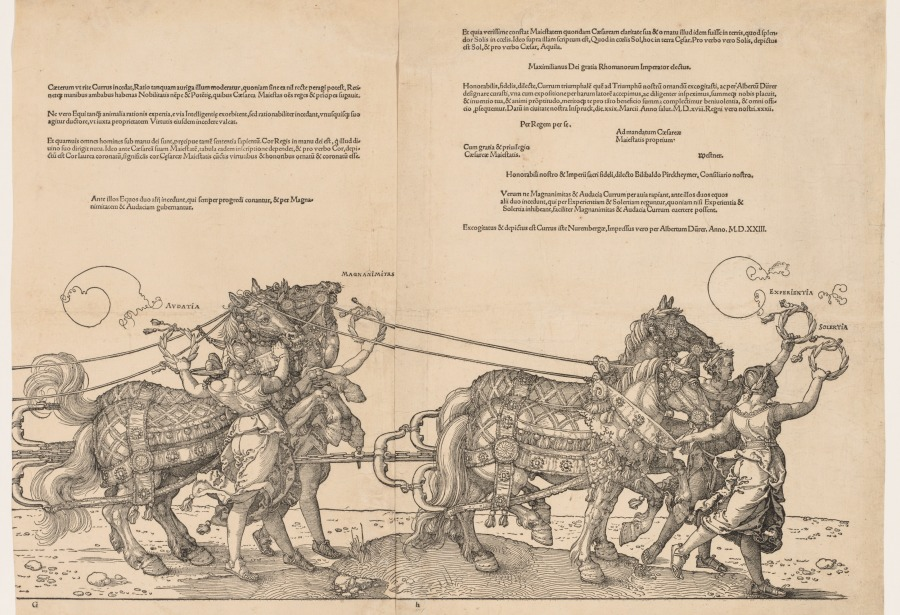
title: The Great Triumphal Car of Emperor Maximilian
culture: Germany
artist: Albrecht Dürer (German, 1471–1528)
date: c. 1523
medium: woodcut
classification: Print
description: Dürer conceived this fantastical chariot as part of a larger commission to depict Holy Roman Emperor Maximilian I (reigned 1486–1519) in a triumphal procession. The ruler sits enthroned in the lavish car, as Victory holds a laurel wreath above his imperial crown. Her feathered wings list Maximilian’s military campaigns. Nearly every component of the allegorical pageant—from the entourage of female attendants to the laurel garlands—has a Latin label describing honorable qualities of an ideal prince. The car rolls on wheels of Magnificence, Honor, Dignity, and Glory. Its driver is Reason, who guides a team of 12 horses with reins of Nobility and Power. Virtues of Justice, Strength, Wisdom, and Temperance, stand on pedestals arranged around the emperor. Maximilian died in 1519, before the ambitious commission could be completed. Dürer published The Great Triumphal Car at his own expense with text composed by his friend Willibald Pirckheimer (1470–1530).